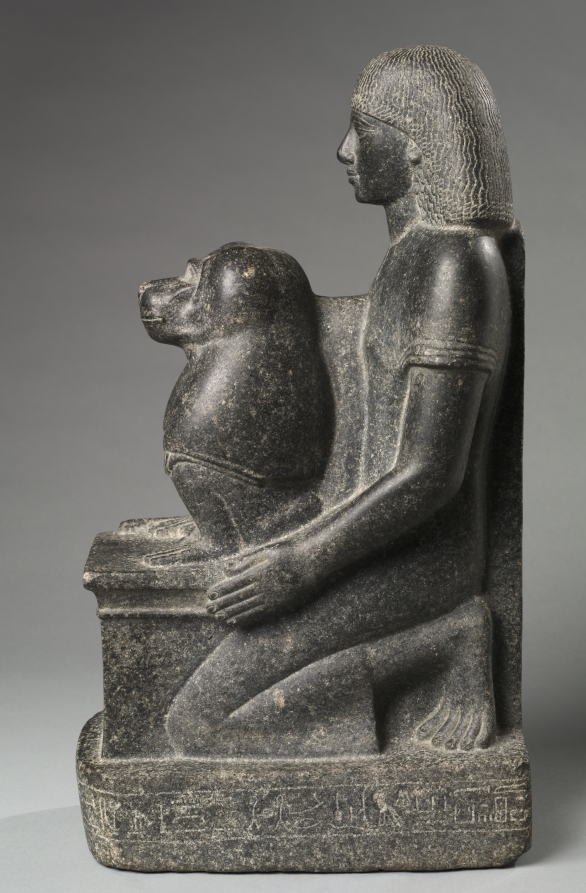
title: Statue of Minemheb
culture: Egypt, New Kingdom (1540–1069 BCE), Dynasty 18, reign of Amenhotep III (1390–1352 BCE)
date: c. 1391–1353 BCE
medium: granodiorite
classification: Sculpture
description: Minemheb was one of the many court officials who helped prepare for Amenhotep III's 30-year jubilee festival. Clearly, Minemheb regarded this as the high point of his career, since his title as chief of construction for the jubilee temple is the primary one provided on this statue. It is actually a statue within a statue: Minemheb kneels to present a small altar, upon which squats a statue of the god Thoth in baboon form. Carved in extremely hard stone, Minemheb's statue is nonetheless carefully detailed and superbly modeled. Special attention was given to the rendering of the baboon's face. The heavy-lidded eyes and furrowed brow give the animal an almost contemplative expression.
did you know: The baboon in this sculpture is the god Thoth in one of his animal forms.